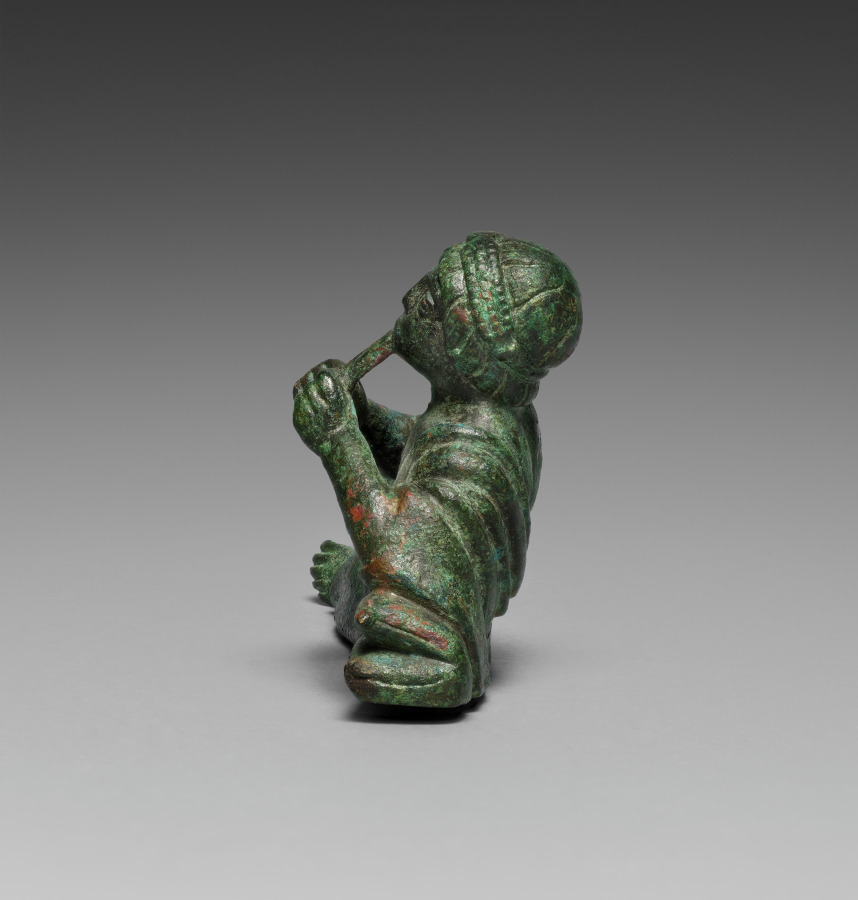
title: Vessel Ornament of Reclining Pipes Player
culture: Etruscan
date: probably 400–375 BCE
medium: bronze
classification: Sculpture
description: This bronze banqueter figurine was one of six once adorning the rim of a large basin, now lost. Cast in molds with individualized details, most have grooves on their underside to attach to the basin. Minute traces of gilding remain on areas of clothing and skin (mostly visible only under magnification), suggesting that they may have been completely gilded. Two handles in the form of hippocampi, horses with serpentine tails, also belonged to the basin and are now displayed at the Michael C. Carlos Museum at Emory University. The basin may have been used to hold liquid for a banquet, or was perhaps funerary. This bronze reclining figurine raises his head and blows into a set of pipes. The tips of the pipes are broken off. Some gilding remains on the mouth and chin. The figurine wears a himation over his body and has a bare chest. Two pillows prop up his left elbow. His hair falls over his forehead in square bangs.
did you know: Guests were often invited to play instruments and sing during symposia.